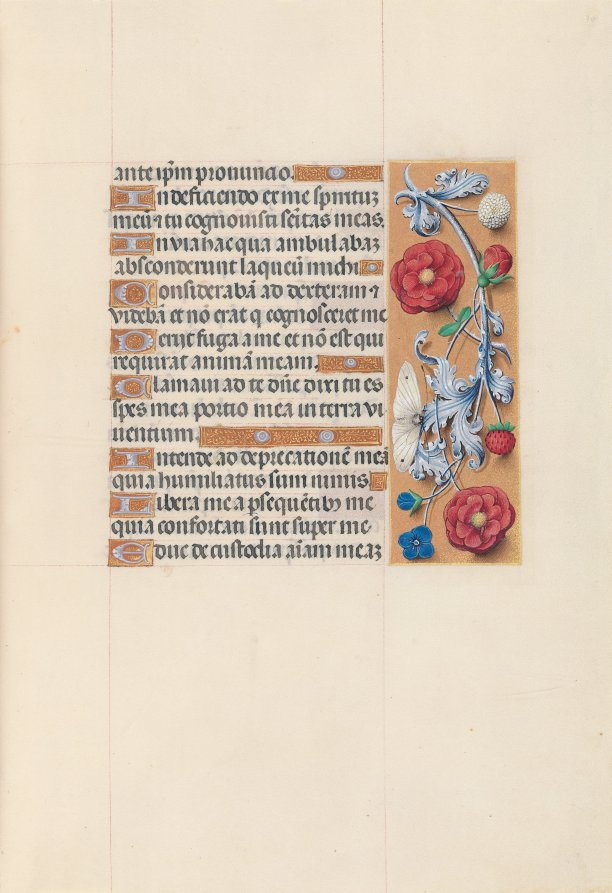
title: Hours of Queen Isabella the Catholic, Queen of Spain: Fol. 70r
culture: Flanders, Ghent and Bruges, late 15th century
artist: Master of the First Prayerbook of Maximillian (Flemish, c. 1444–1519)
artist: and Associates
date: c. 1500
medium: ink, tempera, and gold on vellum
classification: Bound Volume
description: This manuscript was illuminated by a circle of at least five highly organized manuscript painters active in the Flemish cities of Ghent and Bruges. The principal illuminator was Alexander Bening, who painted the majority of the book's miniatures. Manuscripts produced by this circle of artists are renowned for the decoration of their borders, which typically feature a rich variety of realistically-painted flowers, birds, and butterflies. This prayer book, called a book of hours, was intended not for a cleric, but for the private devotions of a lay person-in this case, Isabella the Catholic, Queen of Spain (1451-1504). Isabella's coat of arms embellishes the book's frontispiece. It is unlikely that the book was commissioned by the Queen herself; rather, she probably received it as a diplomatic gift from someone courting her patronage, perhaps Cardinal Francisco Jimenez de Cisneros. A Franciscan friar, Jimenez was dependent upon Isabella for his advancement, first to the post of Queen's confessor in 1492, and then to Archbishop of Toledo in 1495.